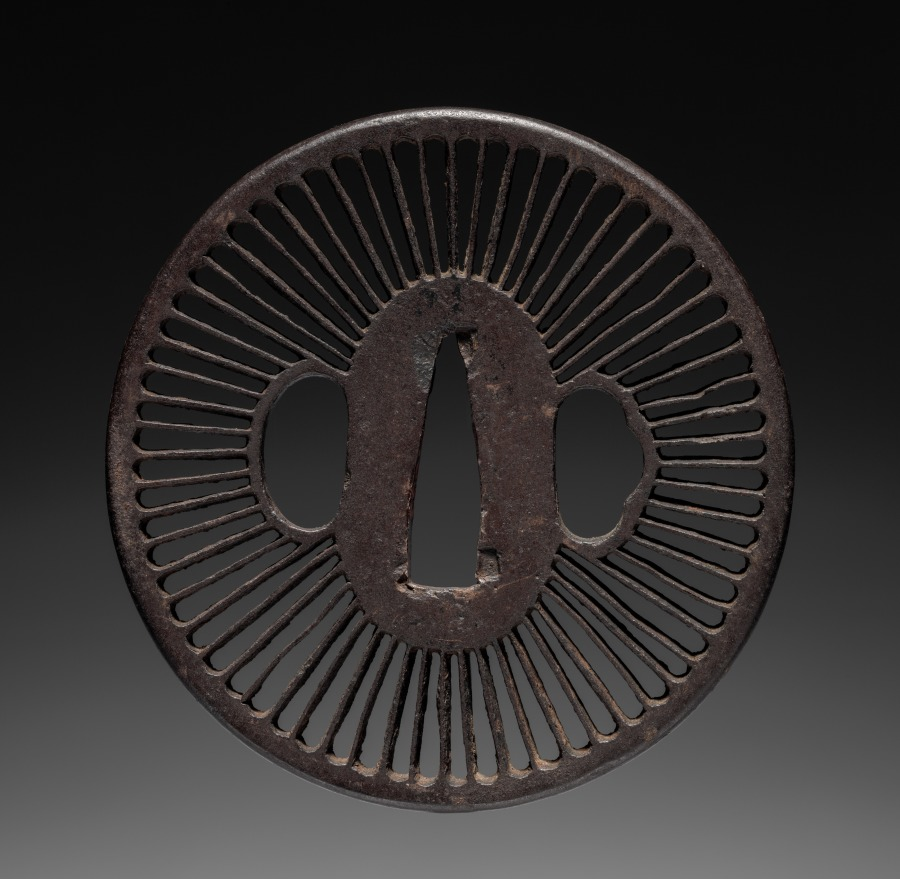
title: Sword Guard (Tsuba)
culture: Japan, possibly Edo period (1615-1868)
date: c. 1615–1868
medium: iron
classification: Arms and Armor